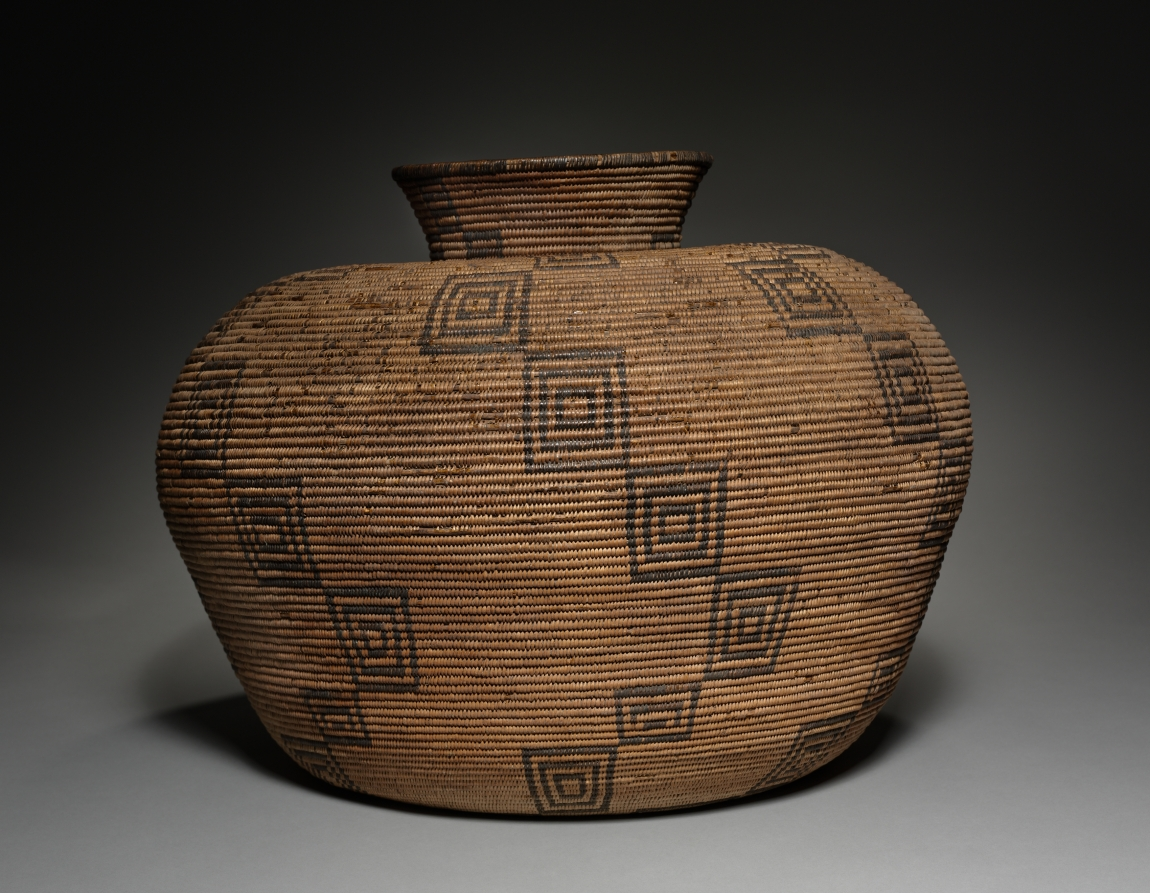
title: Grain Storage Basket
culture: Southwest, White Mountains, Arizona, Apache, 19th century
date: late 1800s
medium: coiled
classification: Basketry